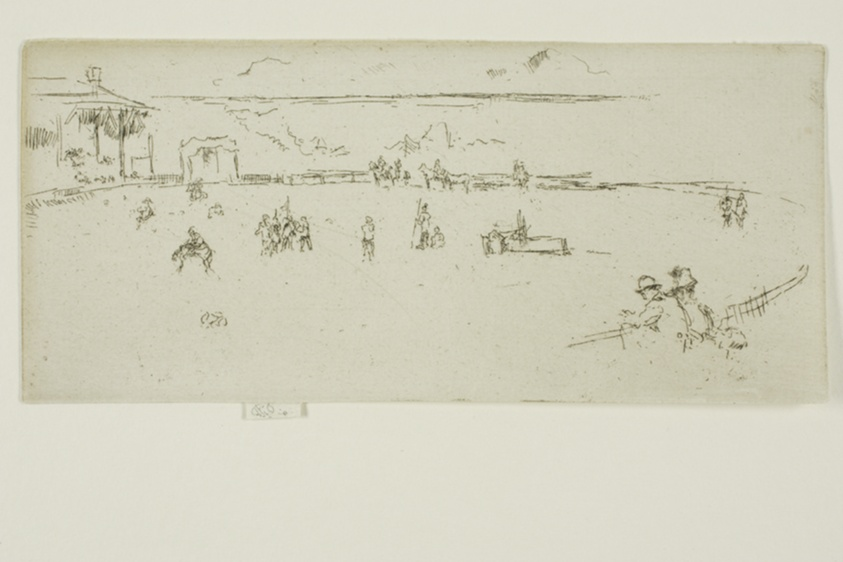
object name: Print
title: The Bucking Horse, Wild West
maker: James McNeill Whistler (American, 1834-1903)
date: 1887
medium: Etching and drypoint with foul biting in black ink on cream laid paper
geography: United States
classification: etching; foul biting; print; prints and drawing; drypoint; paper